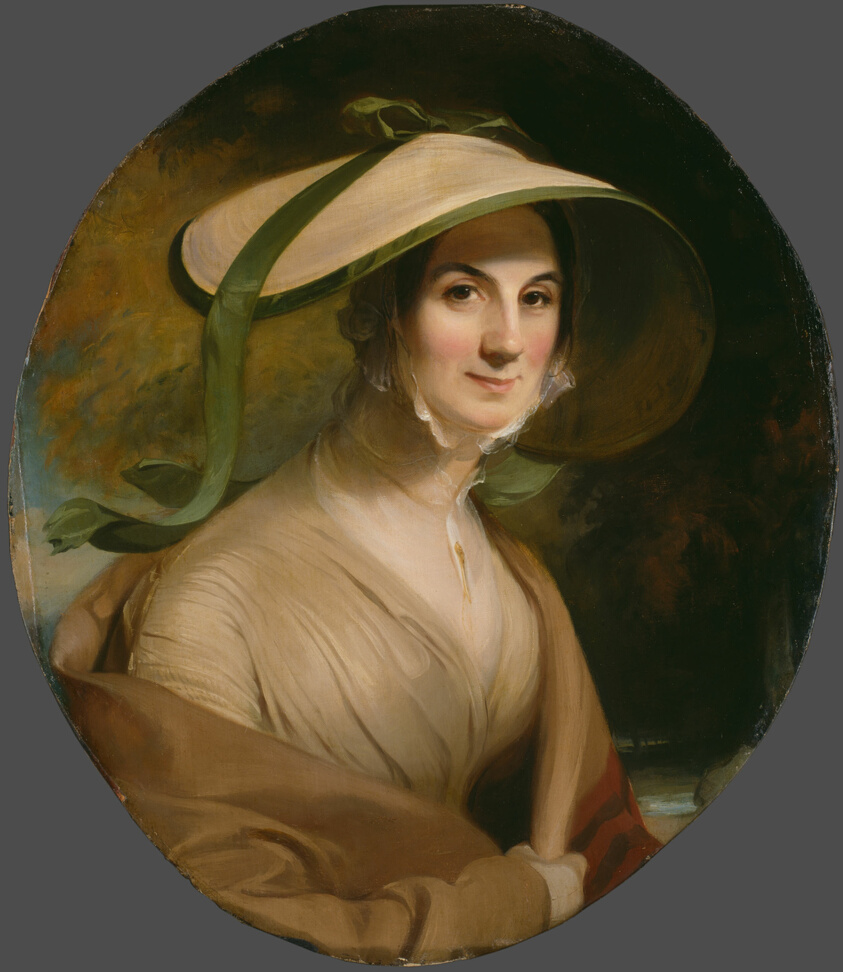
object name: Painting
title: Mrs. George Lingen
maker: Thomas Sully (American, 1783–1872)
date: 1842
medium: Oil on canvas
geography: United States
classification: painting; american arts